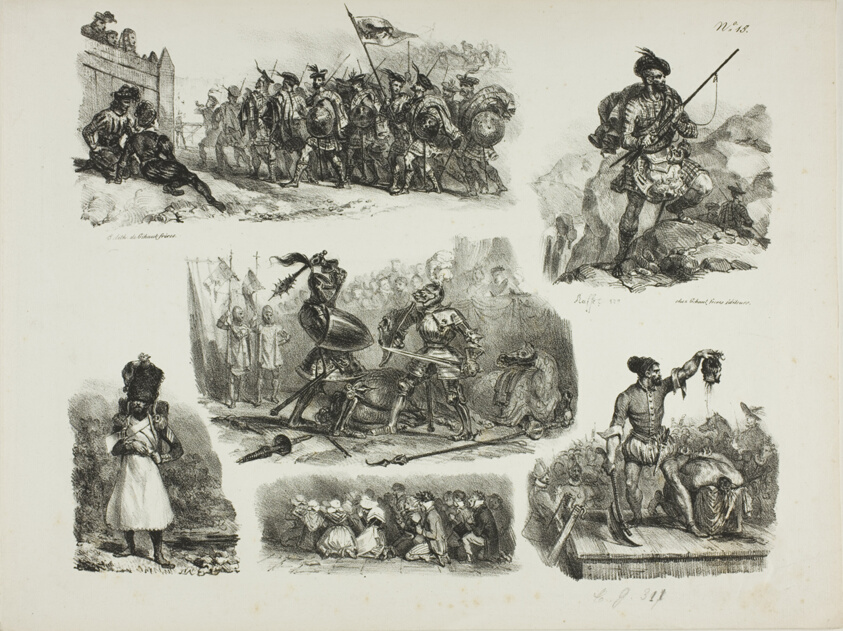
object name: Print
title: Sheet of Sketches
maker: Denis Auguste Marie Raffet (French, 1804-1860); printed by Chez Gihaut Frères (French, 19th century)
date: 1829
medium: Lithograph in black on ivory wove paper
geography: France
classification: lithograph; print; prints and drawing